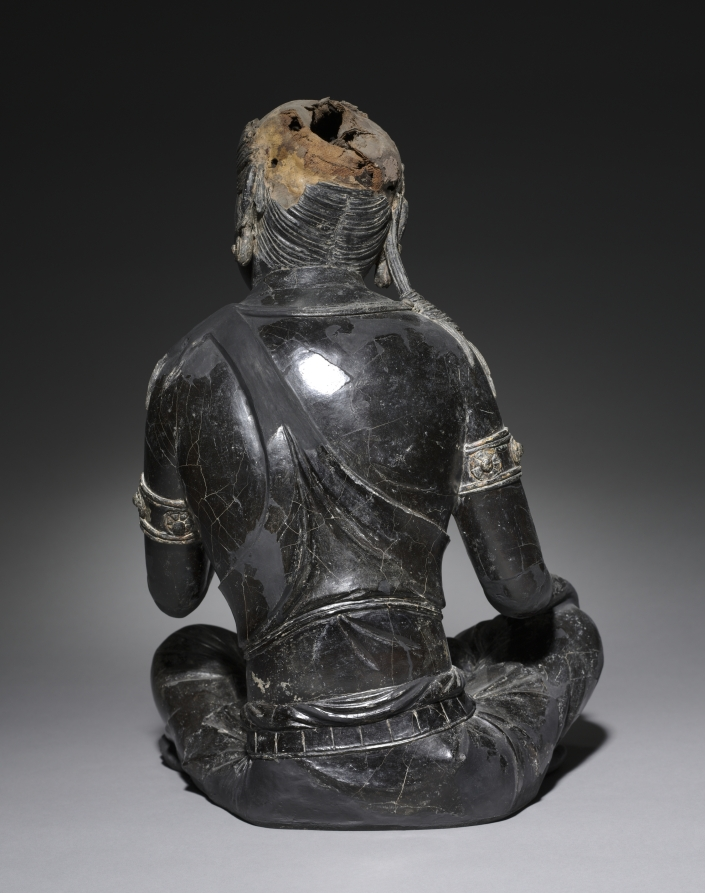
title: Bodhisattva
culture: China, Tang dynasty (618-907)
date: 700s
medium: dry lacquer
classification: Sculpture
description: The bodhisattva, an enlightened being dedicated to the spiritual awakening of all beings, is shown sitting in a relaxed pose, the eyes half-closed in an expression of profound meditation. The statue is modeled in a sensuous manner. It is made using the dry lacquer technique whereby a clay core is first constructed and then overlaid with fabrics saturated with lacquer. Once the lacquer layers are set, the core is removed. This kind of hollow dry lacquer statue is lightweight and easy to carry. The piece once suffered from severe surface retouching that distorted its original beauty. The museum's conservation work has removed coats of overpainting and over-restoration, revealing the true appearance of the glossy black lacquered surface with traces of cut-gold decoration and pigments.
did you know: While lacquer is tough and impervious to insects, it is less durable than wooden or stone sculptures, so this is a rare surviving Tang example.